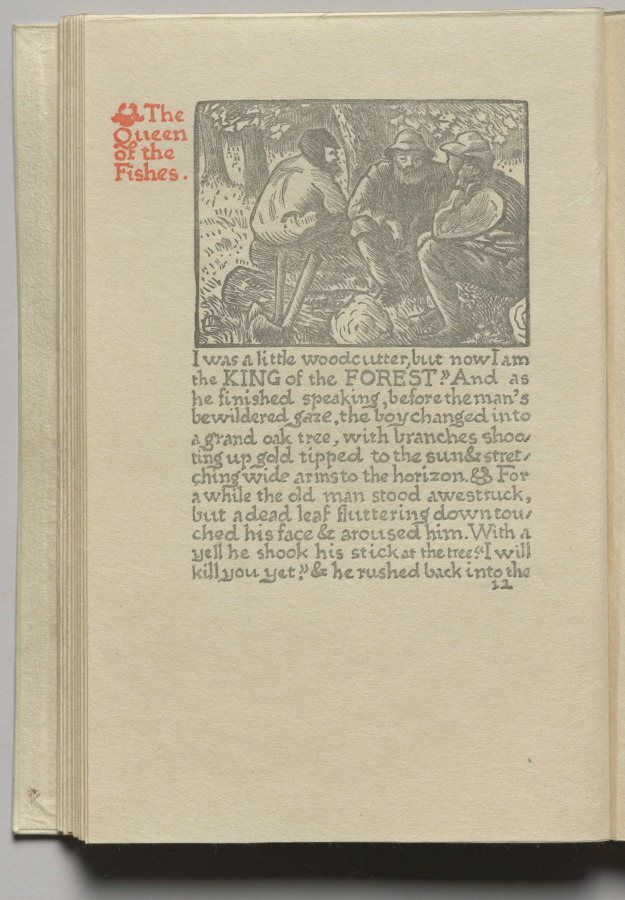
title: The Queen of the Fishes: Plate 11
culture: England, 19th century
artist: Lucien Pissarro (British, 1863–1944)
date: 1894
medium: woodcut printed in gray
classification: Bound Volume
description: Pissarro, son of the French Impressionist artist Camille Pissarro, moved to England in 1890. By 1894 he and his wife, Esther Bensusan Pissarro, had bought a printing press and established the Eragny Press. Influenced by William Morris, they were involved in every step of the production process: designing, cutting the woodblocks, setting type, and printing. The first book published by Ergany Press, The Queen of the Fishes, is based on an old fairy tale in which a peasant boy and girl escape the hardships of their lives by fantasizing that they have been turned into a giant oak and a splendid fish, respectively.